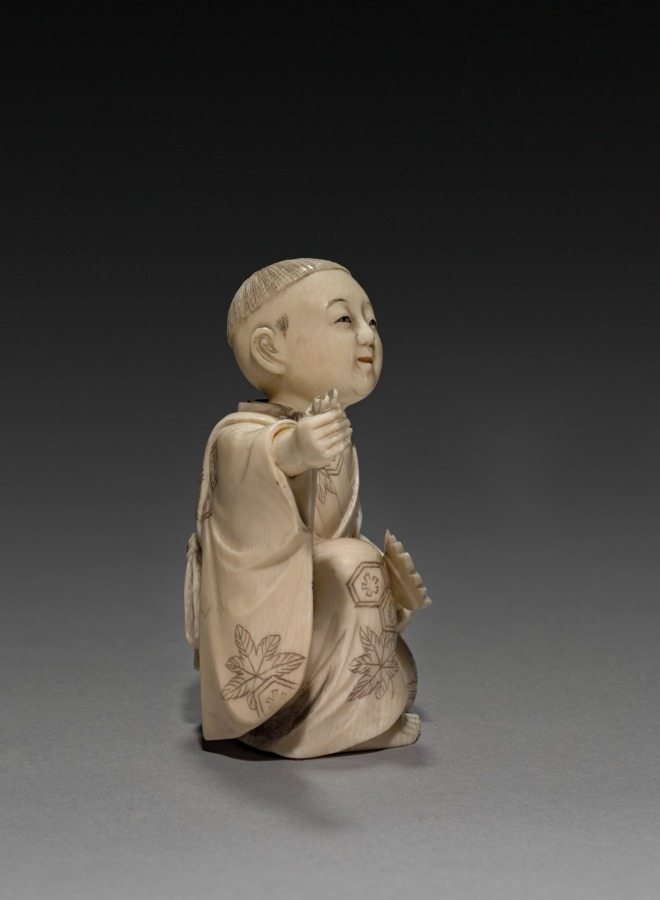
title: Kneeling Boy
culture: Japan, Meiji period (1868–1912)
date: early 1900s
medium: ivory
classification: Ivory